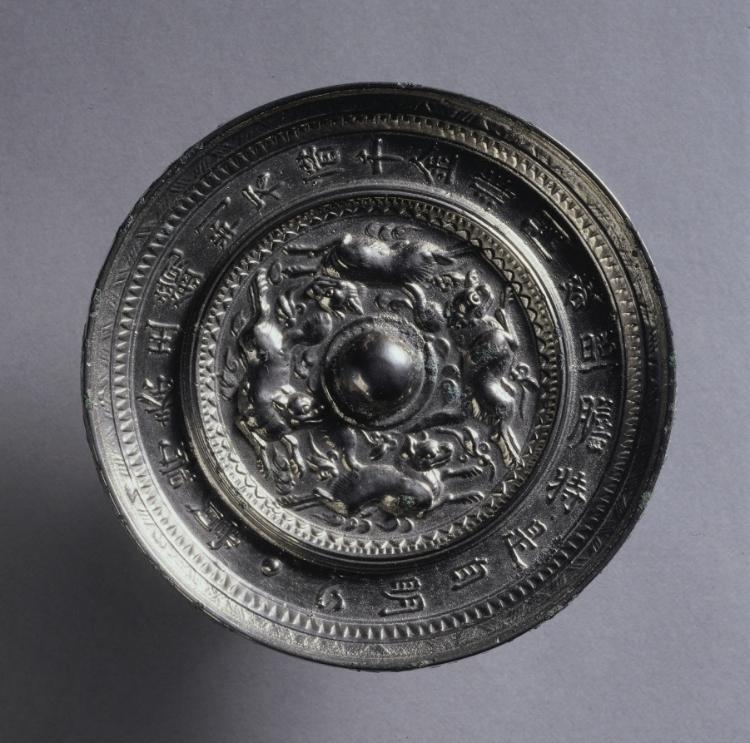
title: Mirror with Four Running Animals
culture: China, Tang dynasty (618–907)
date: early 600s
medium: bronze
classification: Metalwork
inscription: 賞得秦王鏡，判不惜千金。 非關欲照膽，特是自明心。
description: Inscription: I received a gift: the mirror of the King of Qin. For this, I would have paid willingly a thousand taels of silver. In no way would I use it to unveil your hidden desires. Verily, I only wish to lay bare my own heart.